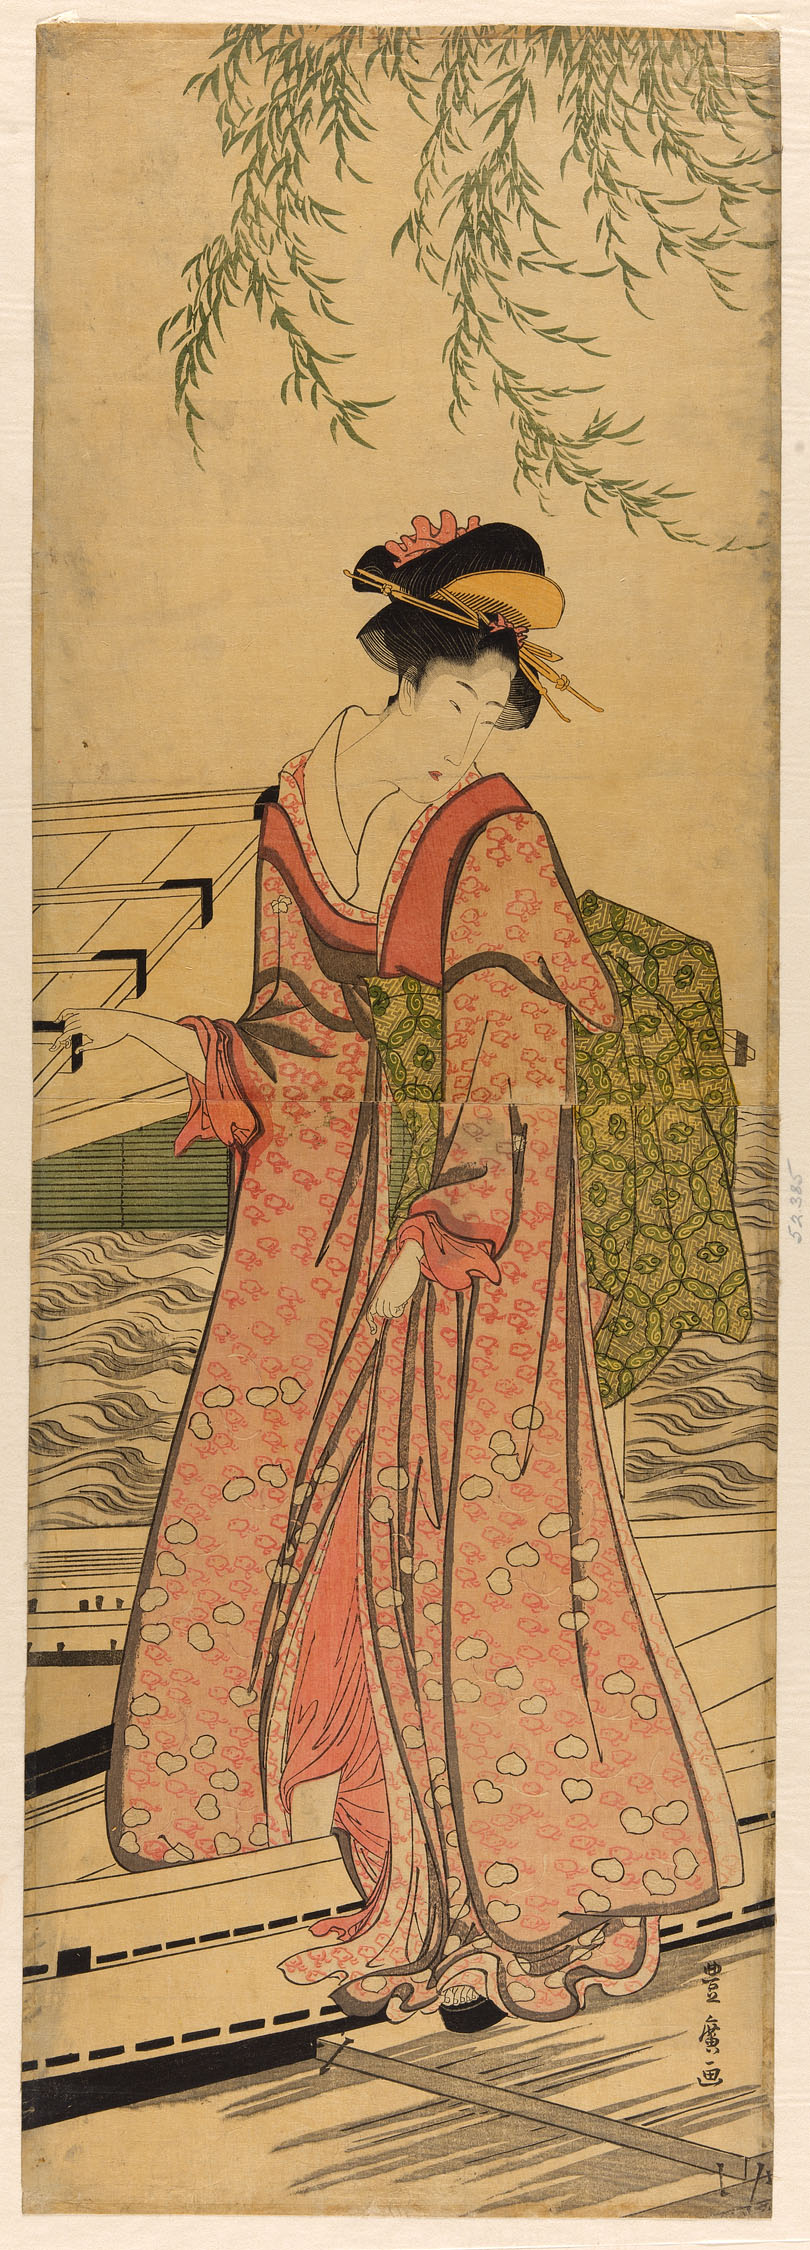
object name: Print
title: Young woman stepping out of a boat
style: Japanese (culture or style)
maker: Utagawa Toyohiro (Japanese, 1773-1828)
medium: Color woodblock print; vertical oban diptych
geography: Japan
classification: woodblock print; print; asian art